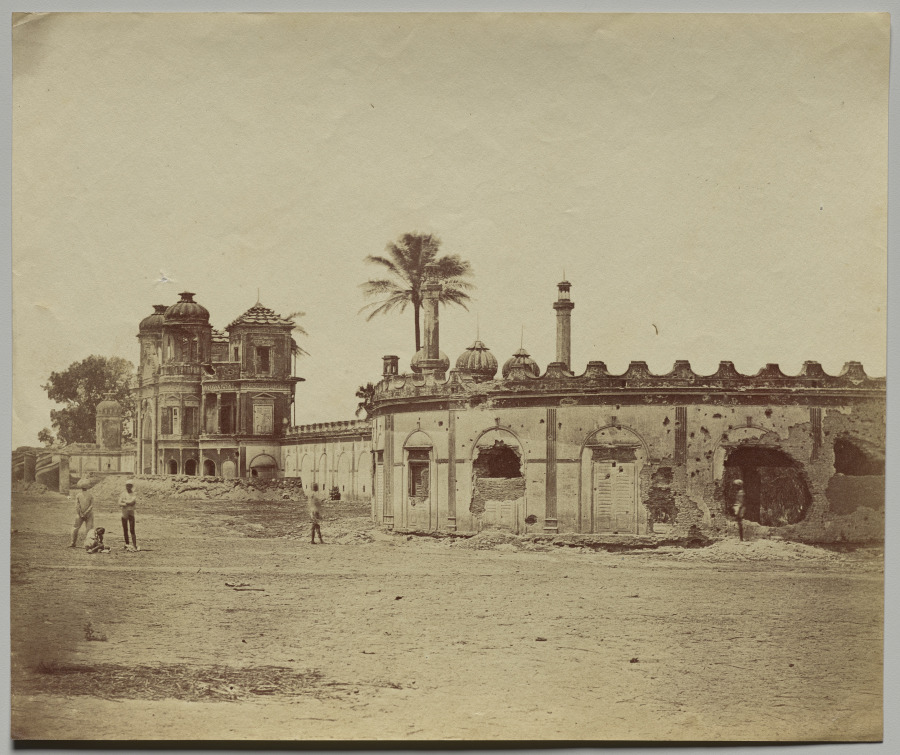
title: The Secundra Bagh, Showing the Breach and Gateway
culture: England, 19th century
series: Lucknow After the Siege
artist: Felice A. Beato (British, 1832–1909)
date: 1858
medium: albumen print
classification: Photograph